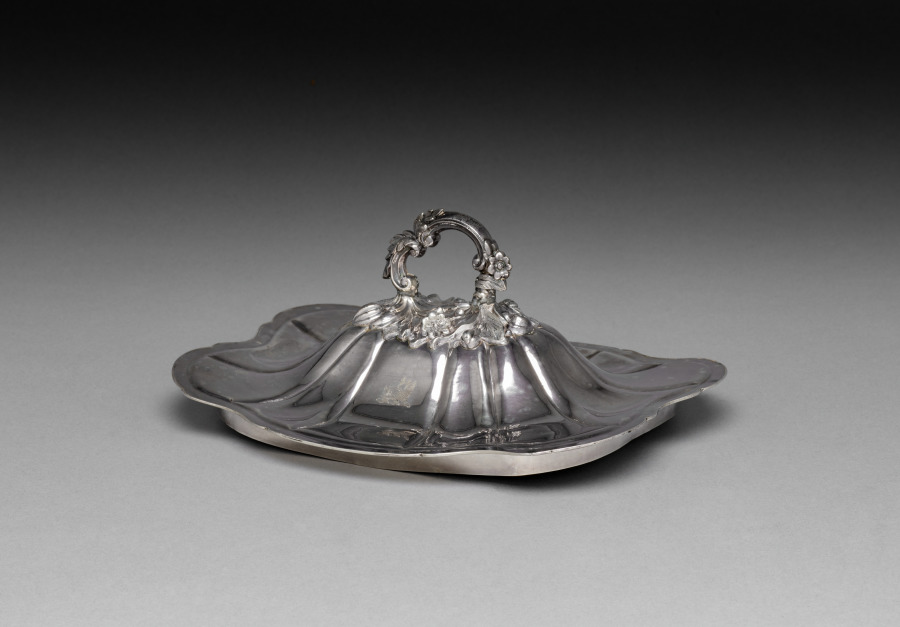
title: Cover for a Tureen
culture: England, Sheffield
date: c. 1830–50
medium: Silver plated on copper (Old Sheffield Plate)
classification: Silver